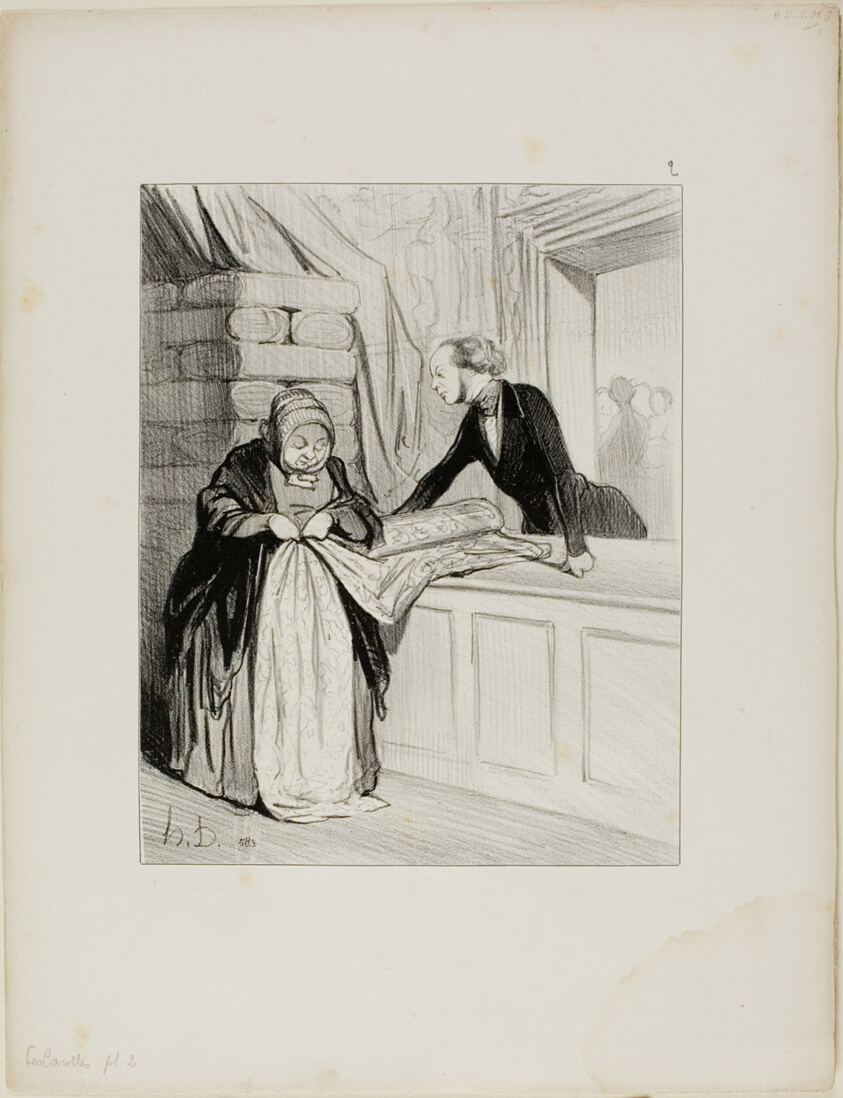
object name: Print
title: The Salesman's Hoax. – A Design Out of Fashion. "This kind of fabric has a delightful shade; Madame is the first to whom I have shown it.... all our young women are going to tear each other apart for it. What a charming design.... it would look marvellous on such an elegant form.... you absolutely need this, Madame," plate 2 from Les Carottes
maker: Honoré Victorin Daumier (French, 1808-1879); printed by Aubert & Cie. (French, active 19th century); later published in Le Charivari (French, 1832-1915); text by Ernest Jaime (French, 1802-1884)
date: 1844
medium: Lithograph in black on white wove paper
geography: France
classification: lithograph; print; prints and drawing